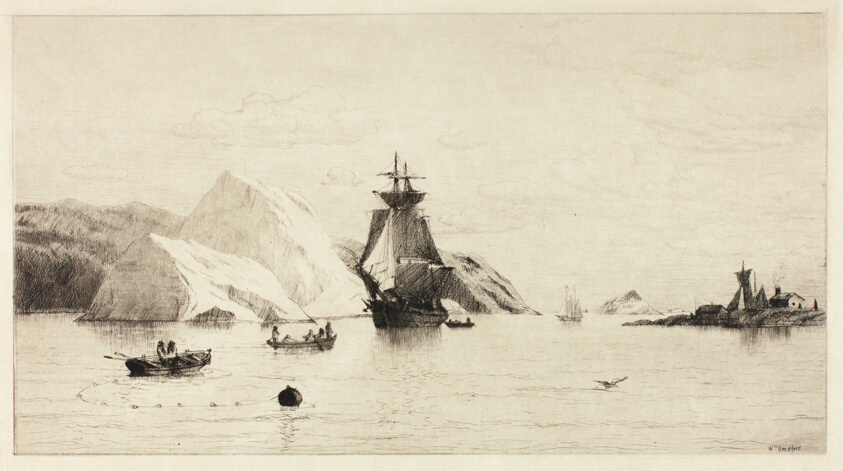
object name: Print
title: Arctic Seascape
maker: William Bradford (American, 1823-1892)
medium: Etching on cream wove paper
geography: United States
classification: etching; print; prints and drawing